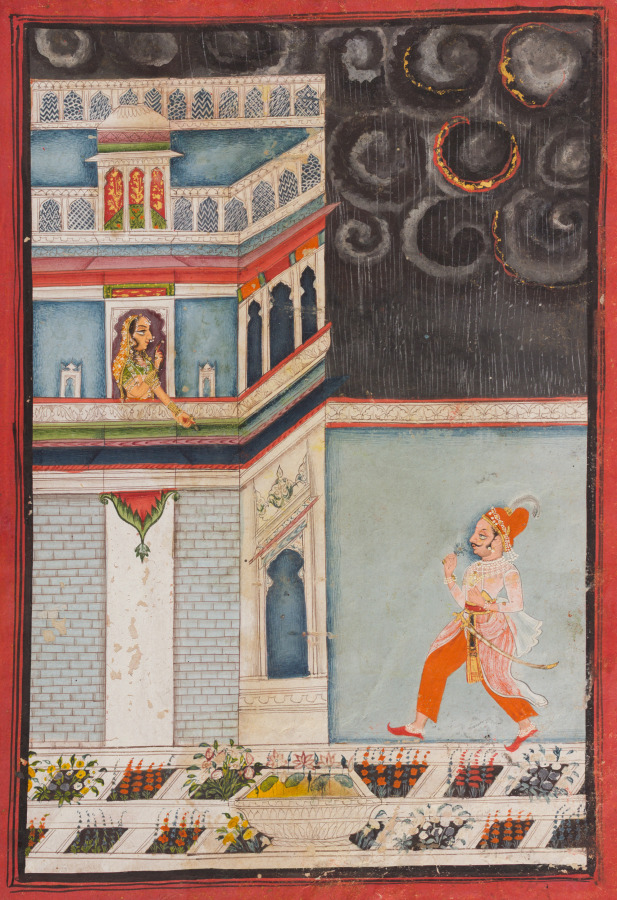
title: Lover's Tryst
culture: India, Rajasthan, Bundi Style, later half 18th century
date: 1750–1800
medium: Gum tempera and gold on paper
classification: Painting